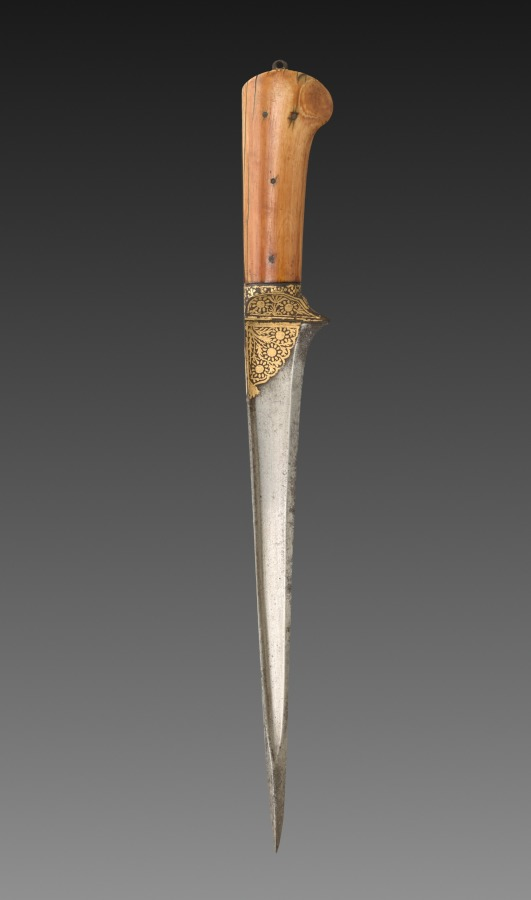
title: Dagger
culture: India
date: 1700s–1800s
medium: silver inlay and leather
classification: Arms and Armor